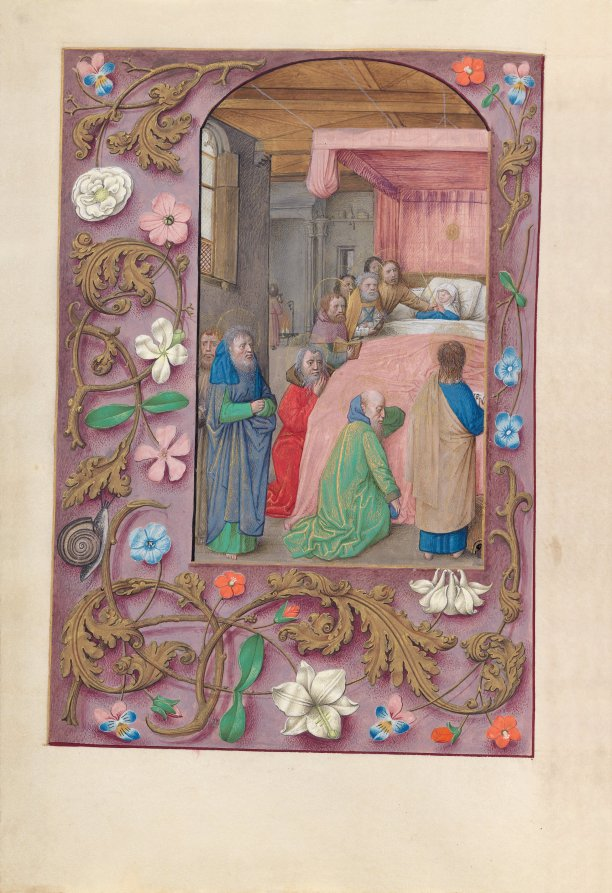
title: Hours of Queen Isabella the Catholic, Queen of Spain: Fol. 154v, Death of the Virgin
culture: Flanders, Ghent and Bruges, late 15th century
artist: Master of the First Prayerbook of Maximillian (Flemish, c. 1444–1519)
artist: and Associates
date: c. 1500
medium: ink, tempera, and gold on vellum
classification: Bound Volume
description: This manuscript was illuminated by a circle of at least five highly organized manuscript painters active in the Flemish cities of Ghent and Bruges. The principal illuminator was Alexander Bening, who painted the majority of the book's miniatures. Manuscripts produced by this circle of artists are renowned for the decoration of their borders, which typically feature a rich variety of realistically-painted flowers, birds, and butterflies. This prayer book, called a book of hours, was intended not for a cleric, but for the private devotions of a lay person-in this case, Isabella the Catholic, Queen of Spain (1451-1504). Isabella's coat of arms embellishes the book's frontispiece. It is unlikely that the book was commissioned by the Queen herself; rather, she probably received it as a diplomatic gift from someone courting her patronage, perhaps Cardinal Francisco Jimenez de Cisneros. A Franciscan friar, Jimenez was dependent upon Isabella for his advancement, first to the post of Queen's confessor in 1492, and then to Archbishop of Toledo in 1495.